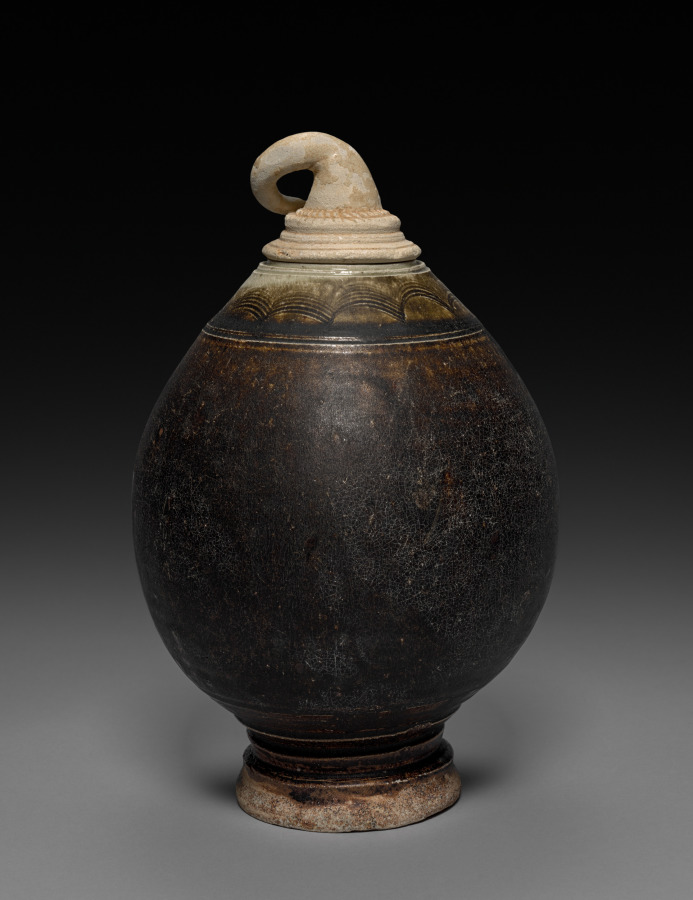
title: Jar in the Shape of a Fruit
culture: Cambodia, Northeast Thai kiln, Khmer Ware, Angkor Wat/Bayon period, 12th century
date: 1100s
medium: glazed pottery with brown slip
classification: Ceramic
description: This dark-brown glazed jar, with the heavy clay body and translucent glaze on the cover and the top just below it, has a rare shape of a fruit. It has a narrow foot with several moldings and incised wavy pattern immediately below the cover which is shaped in the form of a curling fruit stem that forms a handle. It is difficult to determine what type of fruit was meant, possibly a squash.